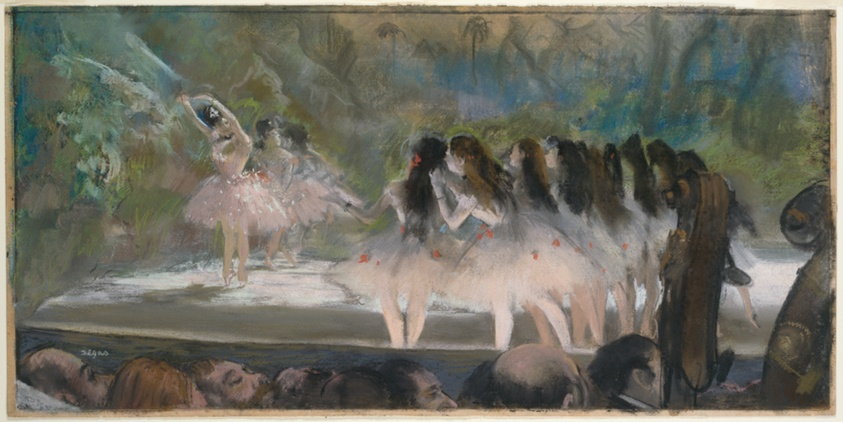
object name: Drawing and Watercolor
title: Ballet at the Paris Opéra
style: Impressionism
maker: Edgar Degas; French, 1834-1917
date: 1877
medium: Pastel over monotype on cream laid paper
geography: France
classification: pastel; drawings (visual works); prints and drawing; paper; monotype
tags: dancers, leisure, work, women